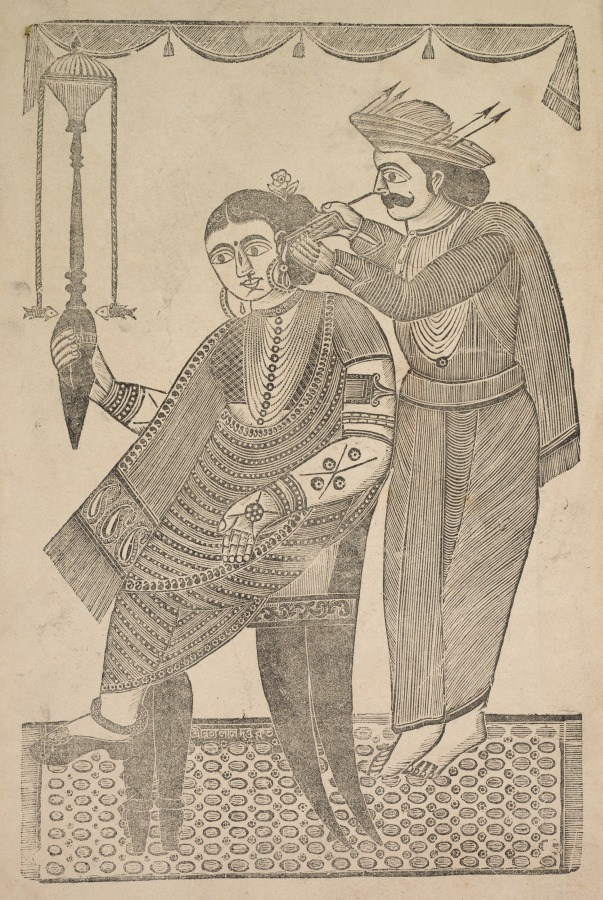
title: A Barber Cleaning the Ear of a Courtesan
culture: Eastern India, Bengal, Kolkata, Kalighat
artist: Shri Gobinda Chandra Roy (Indian, active late 1800s)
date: c. 1890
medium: woodcut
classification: Print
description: Popular Kalighat paintings were made into woodcuts for mass printing and distribution. This image reveals the lifestyle of a new middle class of Indians who prospered under British rule. Holding a fancy hookah for pleasurable smoking, draped with jewels, wearing a glamorous sari, and with a flower tucked in her hair, she has the luxury of going to a barber to have her ears cleaned. The age of mechanical reproduction made a heavy impact on the new Indian middle class during the last decades of the 1800s. British magazines and periodicals were fashionable among Indian households, and they served to shape their taste for British and Western styles and commodities. Cheaper prints such as this woodcut were made for more popular distribution. They spoke to aspirations or observations by a broader, less privileged community.